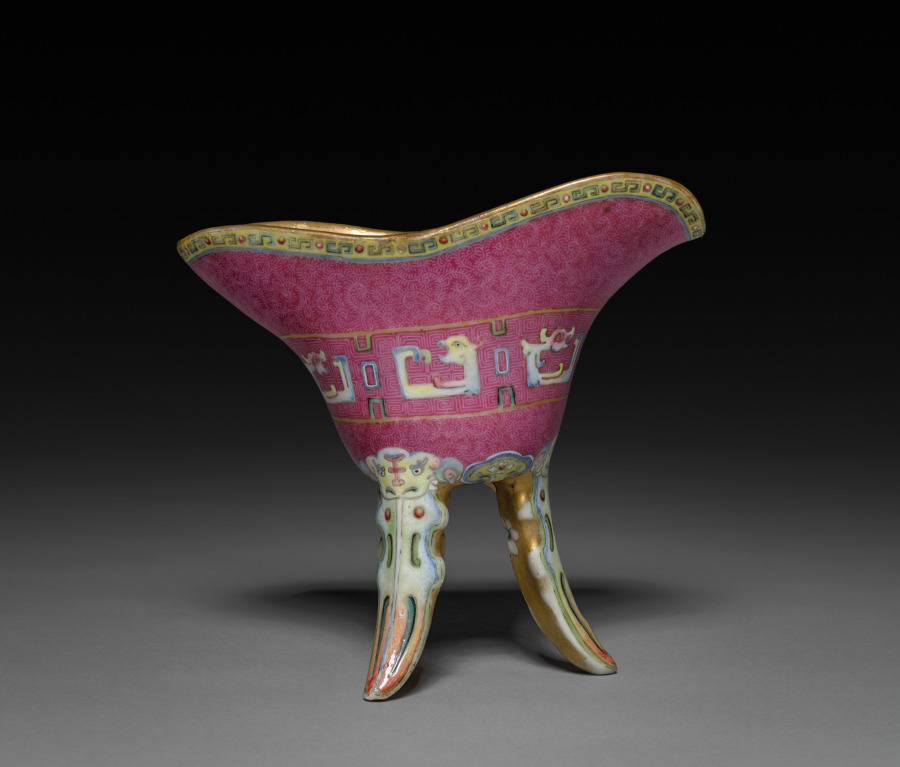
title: Libation Cup of Bronze Format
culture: China, Qing dynasty (1644-1911)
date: 1800s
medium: porcelain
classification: Ceramic